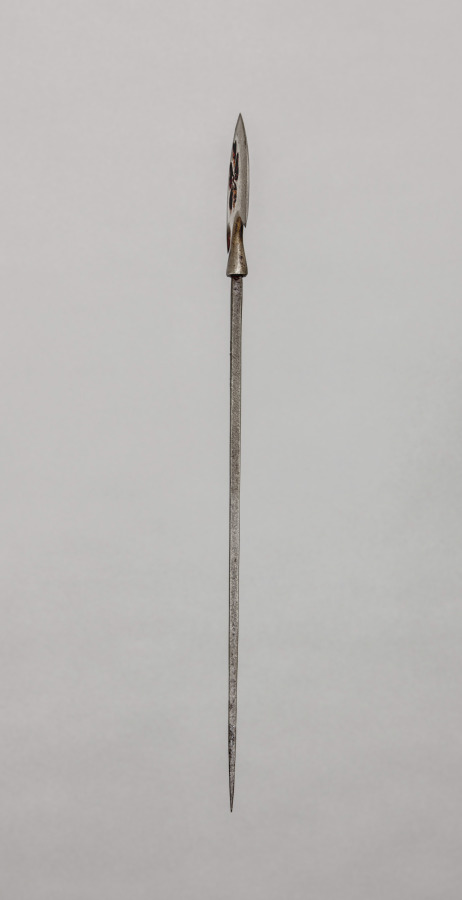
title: Arrow Head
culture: Japan, Edo period (1615–1868)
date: 1600s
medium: iron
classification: Arms and Armor